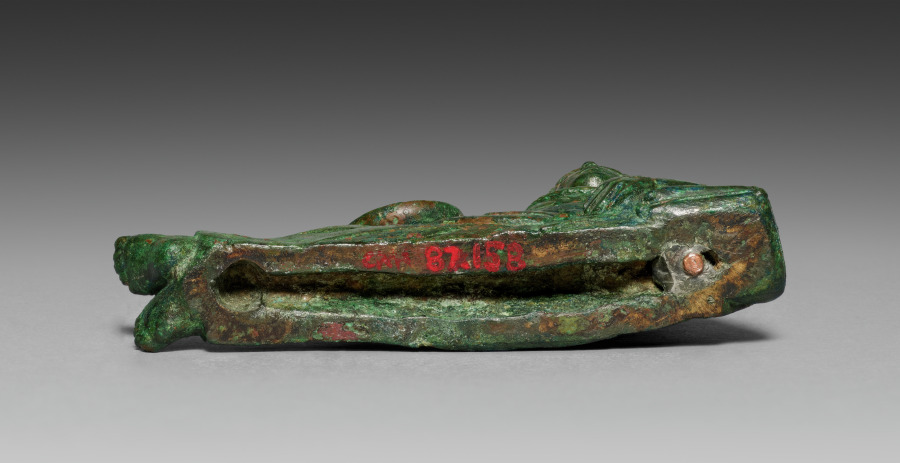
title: Vessel Ornament of Banqueter Holding an Omphalos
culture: Etruscan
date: probably 400–375 BCE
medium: bronze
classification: Sculpture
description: This bronze banqueter figurine was one of six once adorning the rim of a large basin, now lost. Cast in molds with individualized details, most have grooves on their underside to attach to the basin. Minute traces of gilding remain on areas of clothing and skin (mostly visible only under magnification), suggesting that they may have been completely gilded. Two handles in the form of hippocampi, horses with serpentine tails, also belonged to the basin and are now displayed at the Michael C. Carlos Museum at Emory University. The basin may have been used to hold liquid for a banquet, or was perhaps funerary. This bronze figurine holds a phiale mesomphalos, a shallow wine bowl, in his right hand. The vessel is tilted upward as if to spill its contents, perhaps as a libation for the gods. Traces of gilding remain in the corners of the phiale mesomphalos and the figurine’s drapery. His left hand rests against a fold of cloth slipping over his shoulder. A garland lies on his bare chest and another crowns his head. The banqueter shares many similarities with 1987.158.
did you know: Though primarily associated with dedicatory libations, the phiale mesomphalos could also be used for drinking.